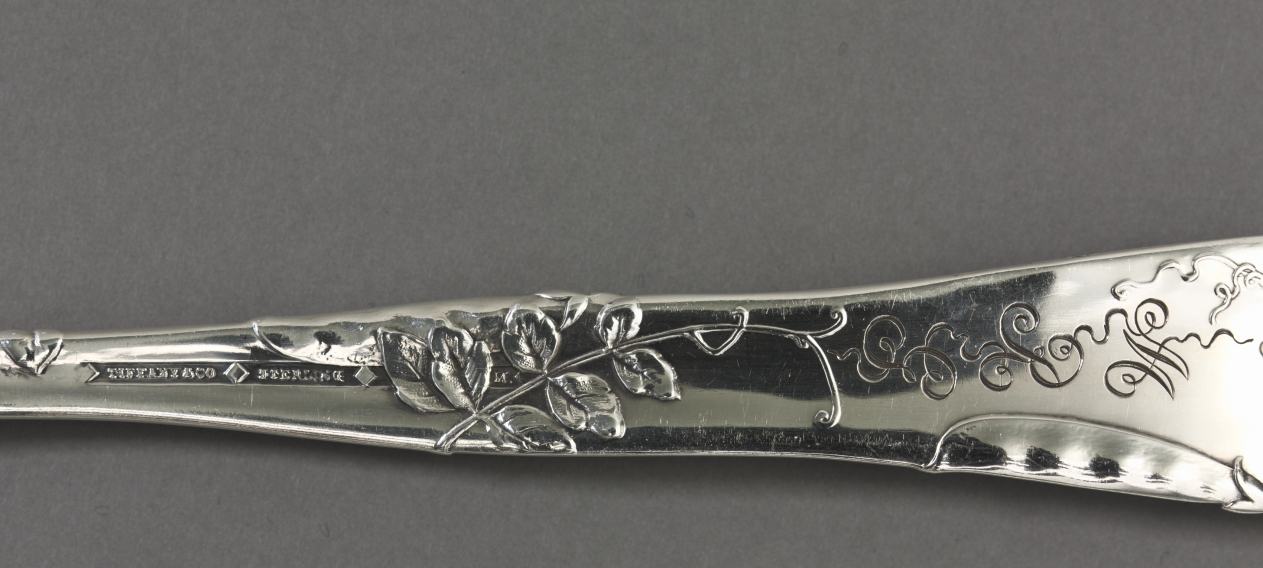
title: Vine Pattern Salad Spoon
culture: America, New York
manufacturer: Tiffany & Co. (America, New York, est. 1837)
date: c. 1872–80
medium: silver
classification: Silver